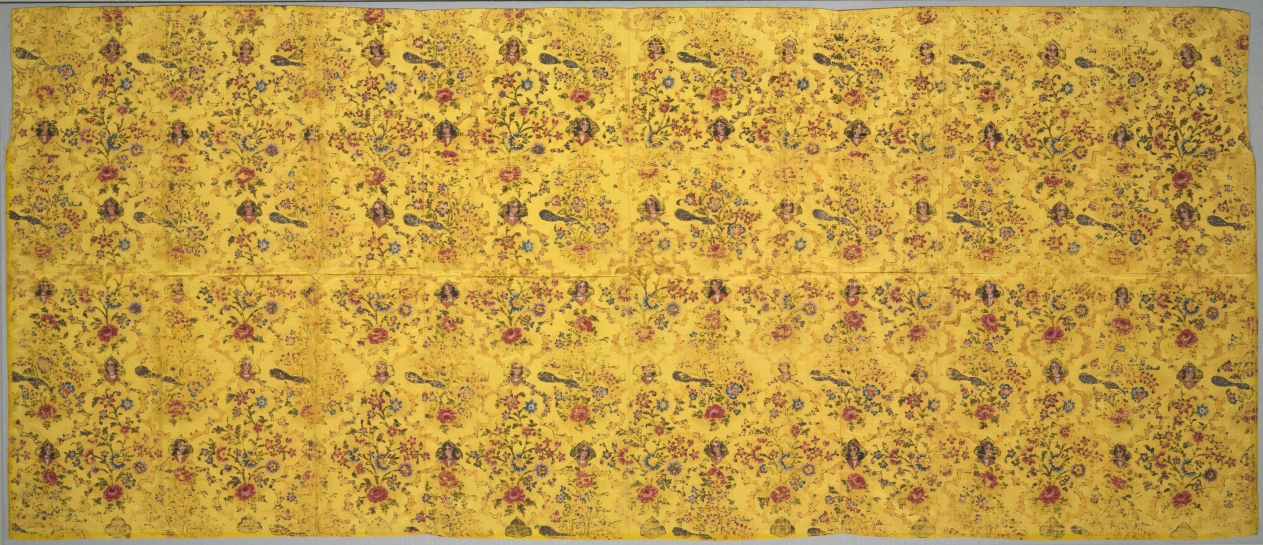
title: Wall cover with flora, peacocks, and portrait medallions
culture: Iran, Qajar period (1779-1925)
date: 1800s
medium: taffeta, hand-painted, block-printed: silk and pigments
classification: Textile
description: The European fashion of installing Chinese export silks with painted decoration as luxurious wall coverings may have inspired this exceptional Iranian silk. European engravings, which had flooded the Iranian market by the 19th century, most likely inspired the pattern. This rare silk fabric with painted figural and foliate decoration may have been a luxurious wall covering in a palace or grand mansion in the city of Kashan where mural paintings display similar 19th-century designs. Glistening silver pigment originally formed the palmette-leaf compartment outlines (now mostly deep yellow) that display colorful blossoming plants enlivened with now tarnished silver peacocks. At their junctures, portrait medallions of Iranian princesses are distinctly Qajar in attire and style, as are the composite blossoming plants.